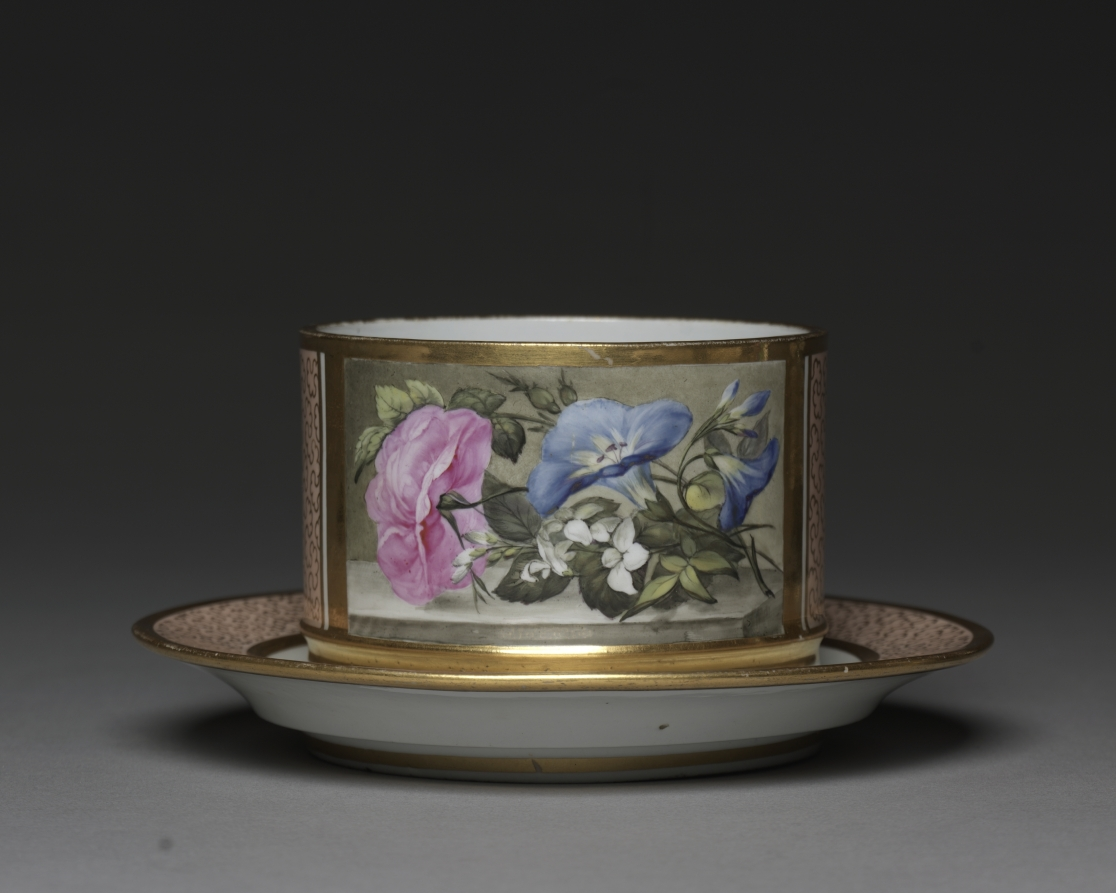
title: Dish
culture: England, Worcester, early 19th Century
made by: Worcester Porcelain Factory (British, established 1751)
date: c. 1810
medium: soft-paste porcelain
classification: Ceramic